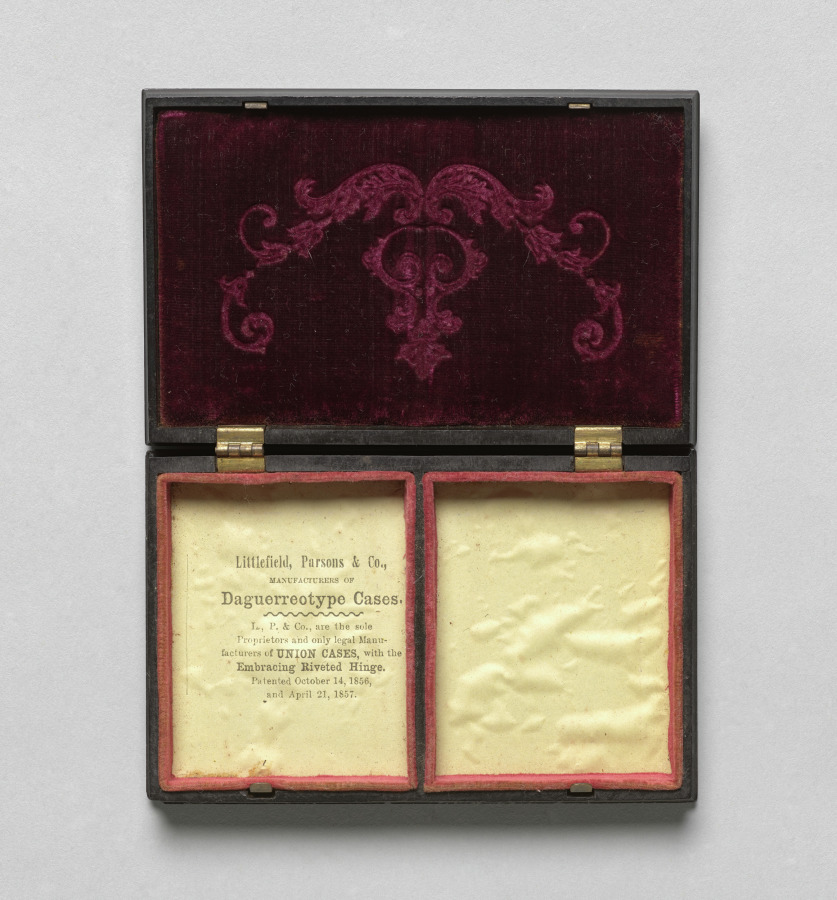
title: Husband and Wife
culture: America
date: c. 1860–65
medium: Two ambrotypes with hand-tinting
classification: Photograph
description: You rarely see a smiling portrait from the mid-19th century. Having your photograph taken was a serious and rare endeavor, plus it was difficult to hold any animated expression long enough for the exposure times required by the early processes. Sitters were instructed to find ways to keep from moving, such as clasping their hands. The woman here has taken the photographers’ cautions to an extreme, resulting in a tense and unflattering portrait.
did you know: In the early decades of photography, many people did not know how to pose for the camera.